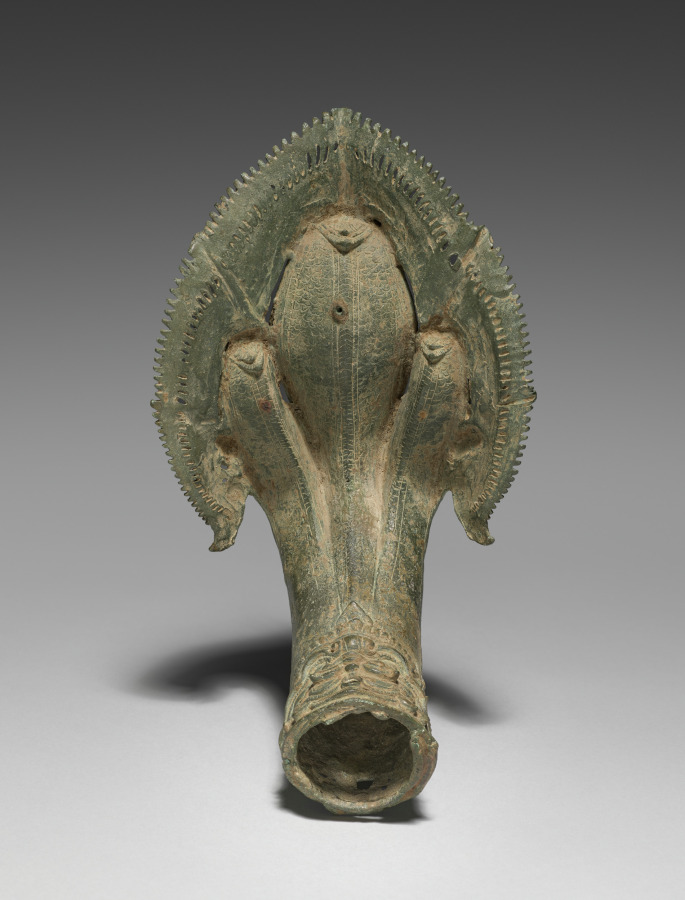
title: Naga Finial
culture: Cambodia, Angkor Wat Period, 12th century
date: 1100s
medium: bronze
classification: Metalwork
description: When members of the royal family or priesthood traveled in a public festival procession or to a temple to make offerings or participate in a ceremony, they would be carried in a palanquin, or a covered litter. Portable objects of veneration, such as bronze images or a sacred fire, were also carried on palanquins. The palanquins had wooden poles, hanging seats or raised platforms, and bronze fittings cast in intricate forms and gilt, lending the palanquins a sumptuous quality. The royal palanquins were typically fitted with multiheaded, serpent-shaped finials at the ends of the poles and corners of the elevated platforms. Naga means serpent in Sanskrit, a language from India selectively appropriated by the Khmer in Cambodia. In their own indigenous mythology, the Khmer people trace their descent from a naga princess and a prince from the island of Java who journeyed to Cambodia. The naga remains a potent emblem for the Khmer nation to this day; it is ubiquitous on Cambodian monuments.